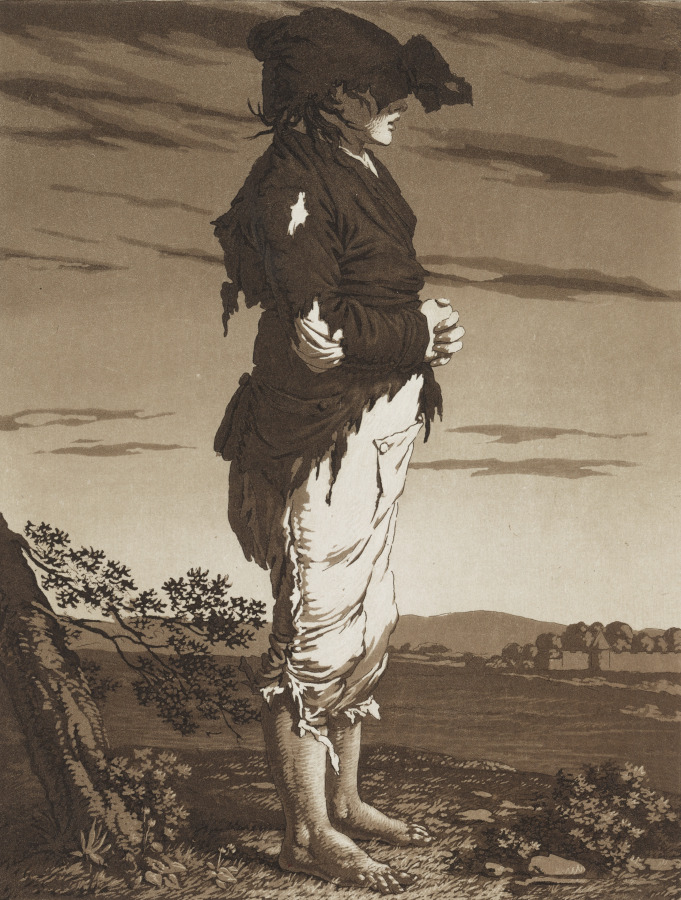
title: The Young Beggars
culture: Germany, late 18th-early 19th century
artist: Karl Ludwig Bernhard Buchhorn (German, 1770–1856)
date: c. 1800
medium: aquatint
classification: Print